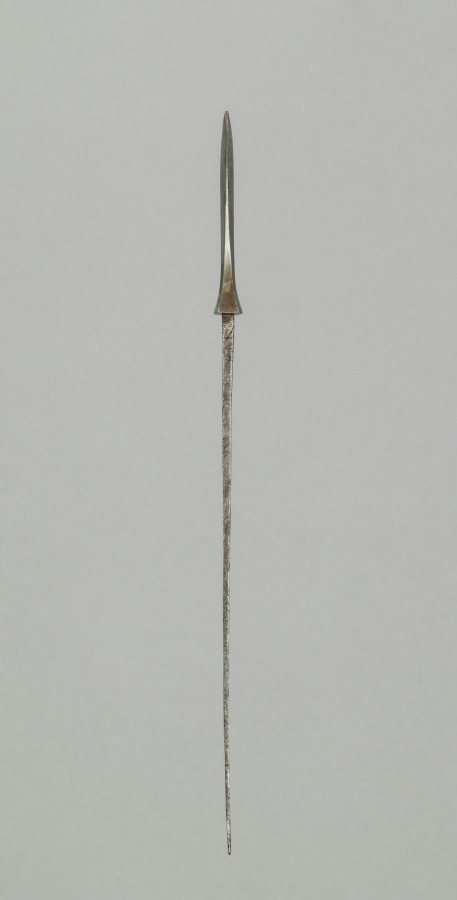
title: Arrow Point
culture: Japan, Edo period (1615–1868)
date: 1700s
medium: steel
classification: Arms and Armor